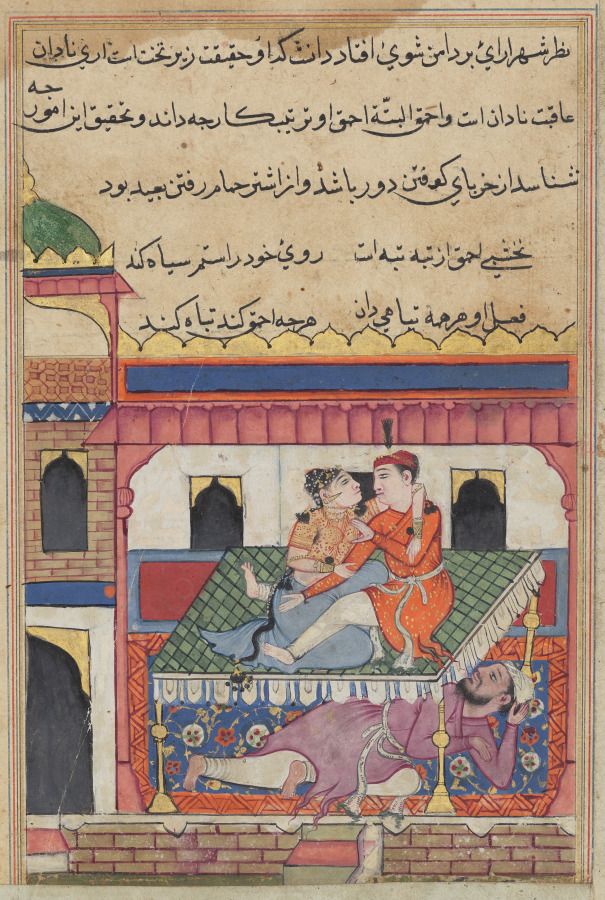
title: Shahr-Arai and her lover dallying on a bed beneath which is concealed her husband, from a Tuti-nama (Tales of a Parrot): Fortieth Night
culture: Mughal India, court of Akbar (reigned 1556–1605)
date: c. 1560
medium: gum tempera, ink, and gold on paper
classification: Painting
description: Shahr-Arai’s husband hides under his wife’s bed in an attempt to catch her in a love affair. Despite his precautions, the ends of his purple robe peek out from beneath the bed. When Shahr-Arai sees this, she quickly concocts a plan to trick her husband and protect her lover.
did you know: Shahr-Arai loudly proclaims that her lover is an adopted brother who will protect the husband’s life.